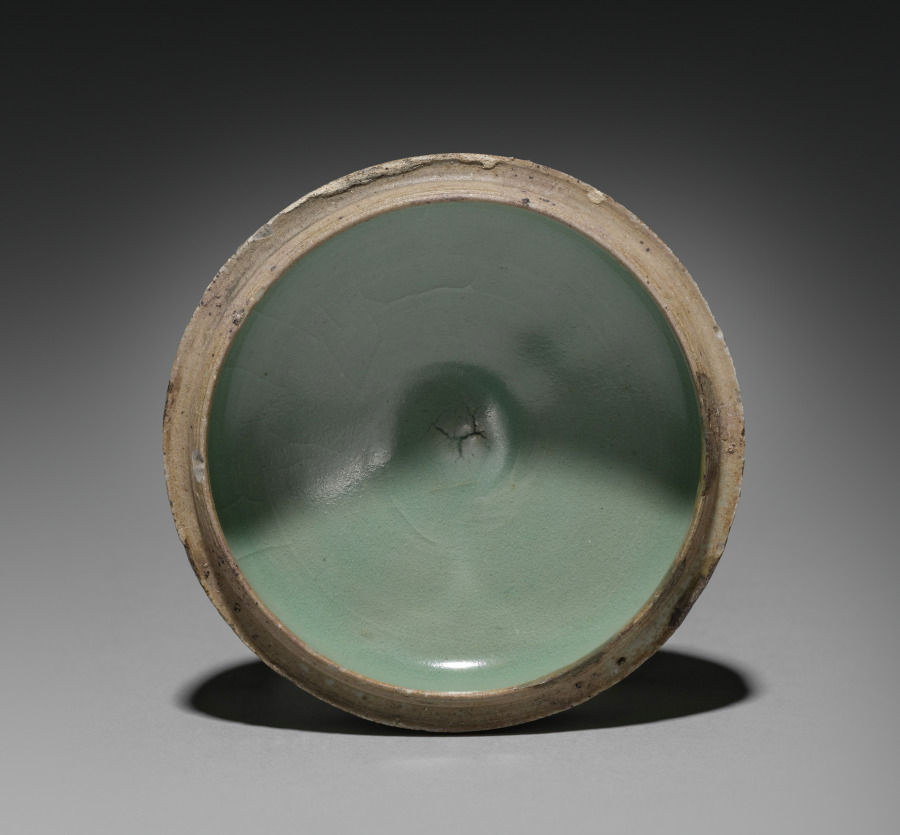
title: Box and Cover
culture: Korea, Goryeo dynasty (918–1392)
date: 918–1392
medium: celadon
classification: Ceramic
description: Celadons, spoons, seals, and bronze mirrors were the most common burial objects in tombs during the Goryeo period (918-1392). Once used to contain color powder, rouge and eyebrow gel for makeup, this small container was one of the standard goods that furnished elites' tombs. Goryeo-period women and men used the grain powder of rice or millet for whitening their skin, safflower extract for rouge, and plant ash or soot for eyebrow gel. Yet, natural-looking make-up seems to have been the most favorable one in Korea according to the travelogue by Xu Jing (1091-1153), the Chinese diplomat who visited Korea in 1123.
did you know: This ceramic container was used to store incense or cosmetics.